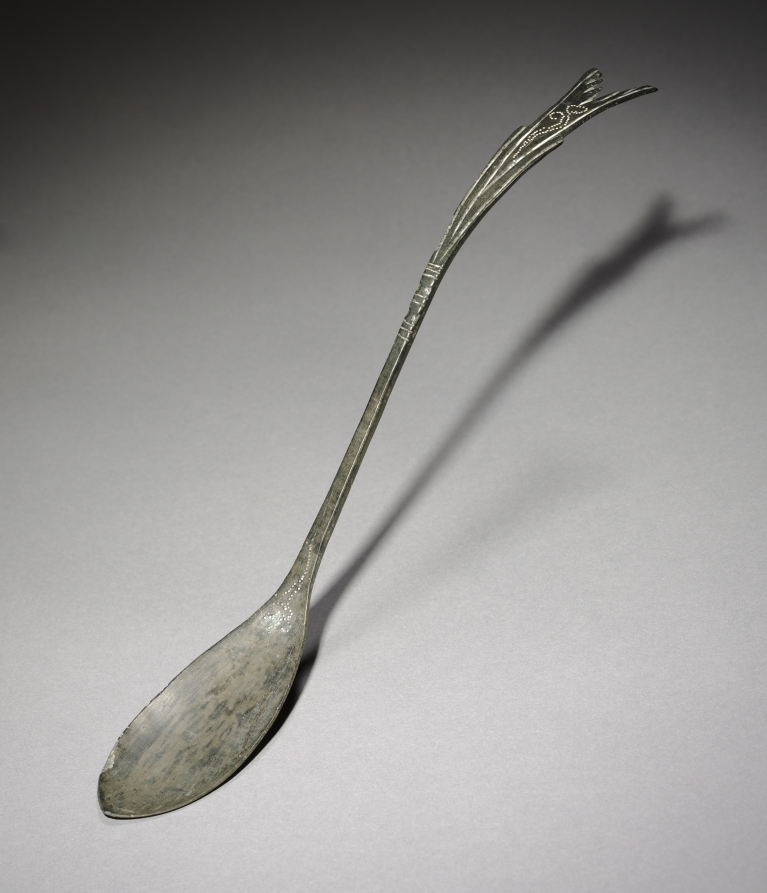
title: Spoon with Fish-Tail Design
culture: Korea, Goryeo dynasty (918–1392)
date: 918–1392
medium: silver bronze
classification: Metalwork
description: Many of Goryeo period spoons like this one feature a curved handle that splits into a jagged fishtail design. This fishtail design is not unique to Korea; it was also widely used in the area under the rule of two non-Han Chinese states: Liao (907–1125) and Jin (1115–1234). These seemingly ordinary objects testify to exciting material interactions between the Goryeo dynasty and non-Han Chinese northern states, which were often omitted from the official records.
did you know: Bronze spoons are the most common burial item. Scholars have proposed that toward the end of the 14th century, Koreans enjoyed meat-based soups more than any other dishes, explaining why spoons became common household items as well as burial goods.